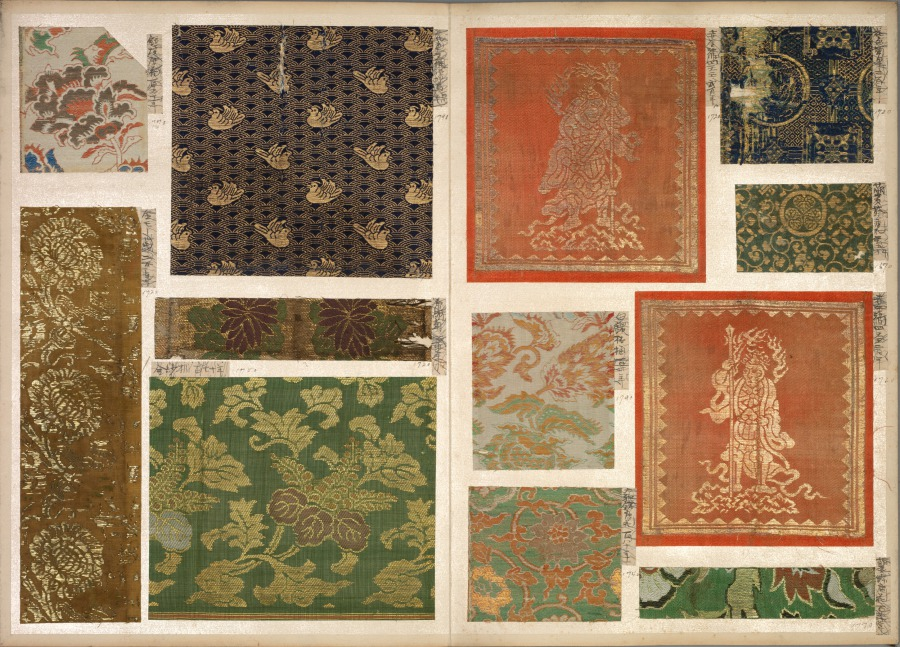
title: Album of Textile Samples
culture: Japan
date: 1790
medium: silk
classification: Textile